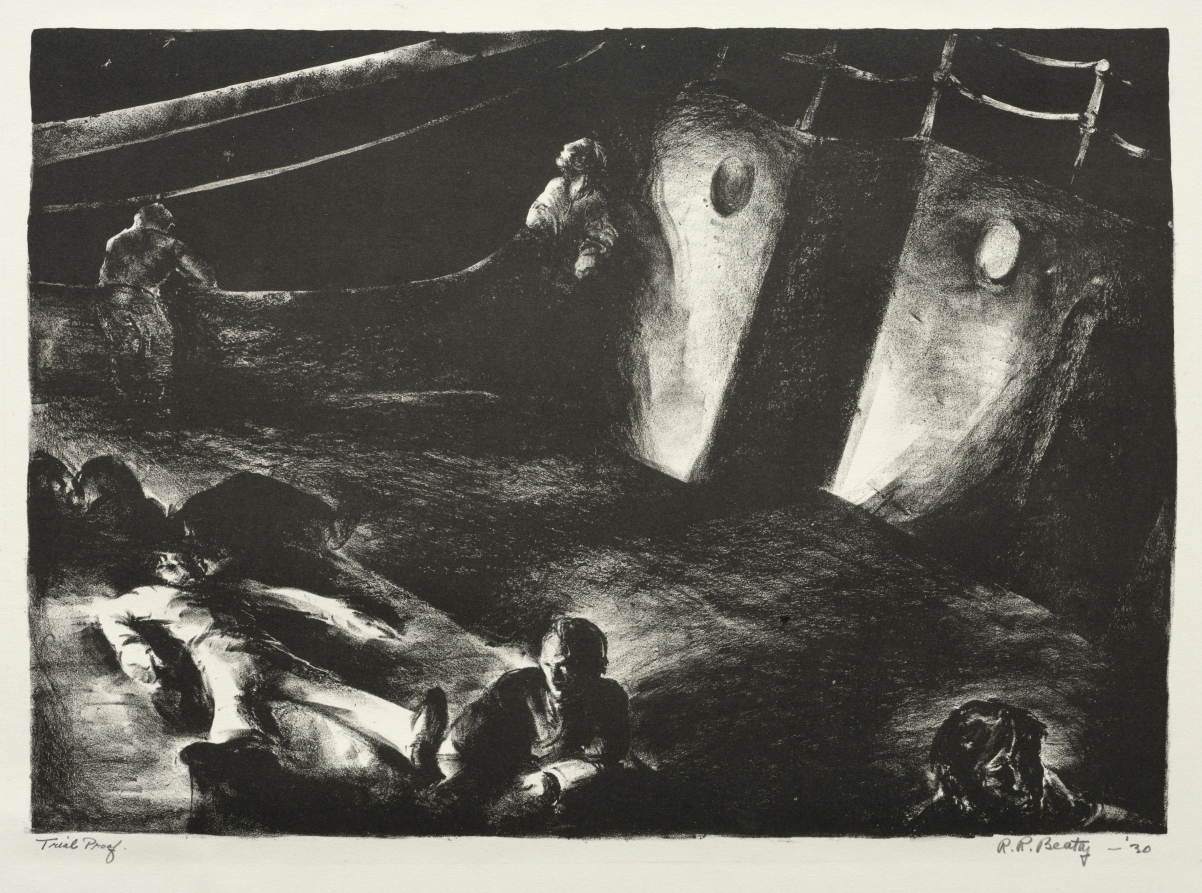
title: S. S. Glencairn: The Moon of the Caribbes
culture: America, Ohio, Cleveland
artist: Richard Beatty (American, 1899–1961)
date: 1930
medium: lithograph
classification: Print